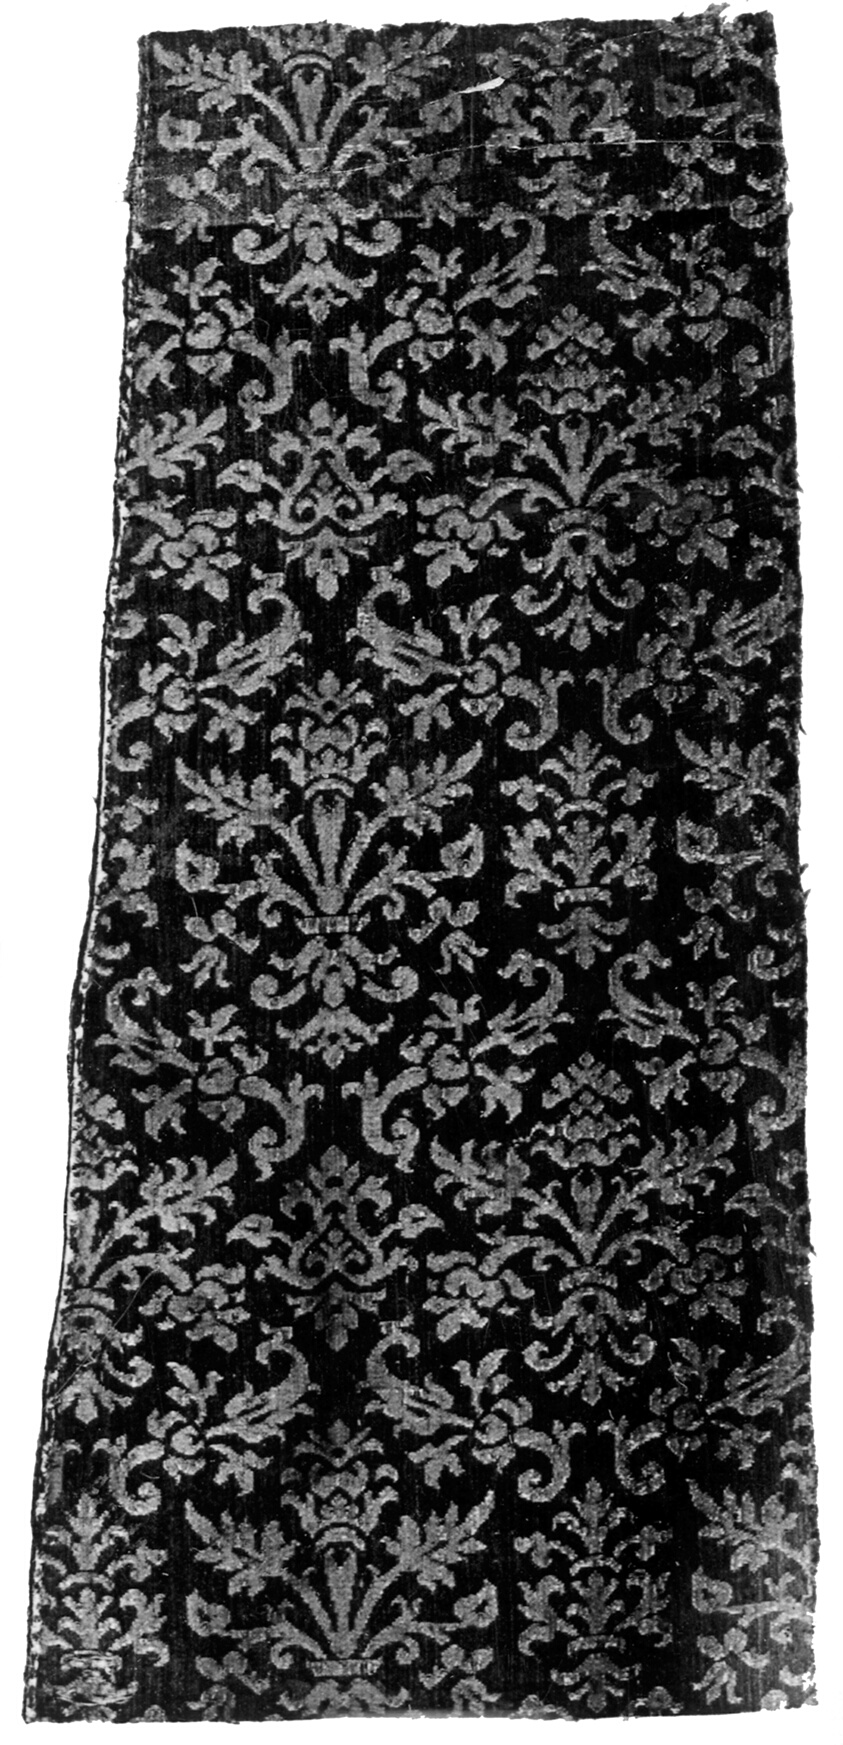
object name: Textile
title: Fragment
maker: Italy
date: Late 16th century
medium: silk damask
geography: Italy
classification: textile; weaving